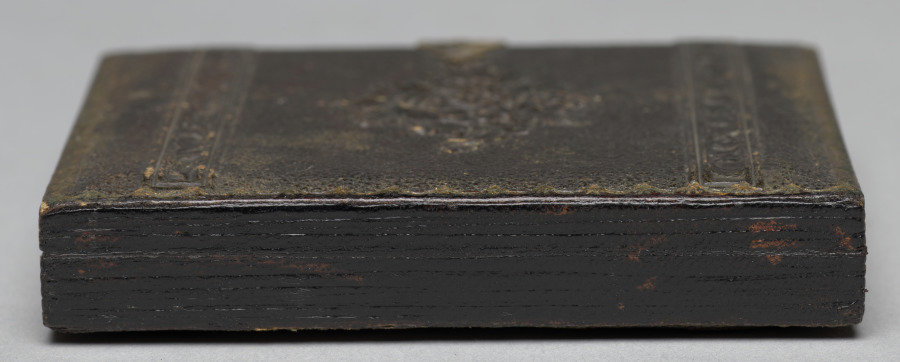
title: Poodle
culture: America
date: c. 1861–63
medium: ambrotype, tinted, sixth plate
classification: Photograph